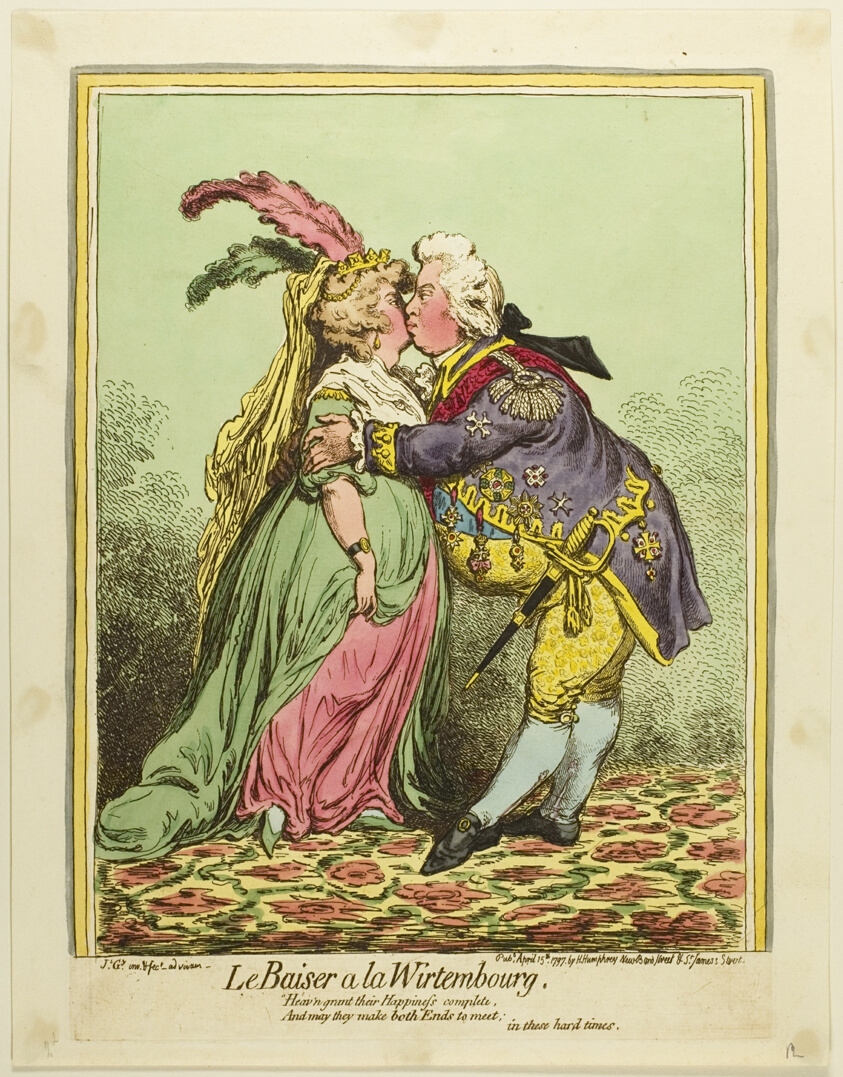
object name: Print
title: The Kiss at Würtemberg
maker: James Gillray (English, 1756-1815); published by Hannah Humphrey (English, c. 1745-1818)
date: published April 15, 1797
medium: Hand-colored etching on paper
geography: England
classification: etching; print; prints and drawing